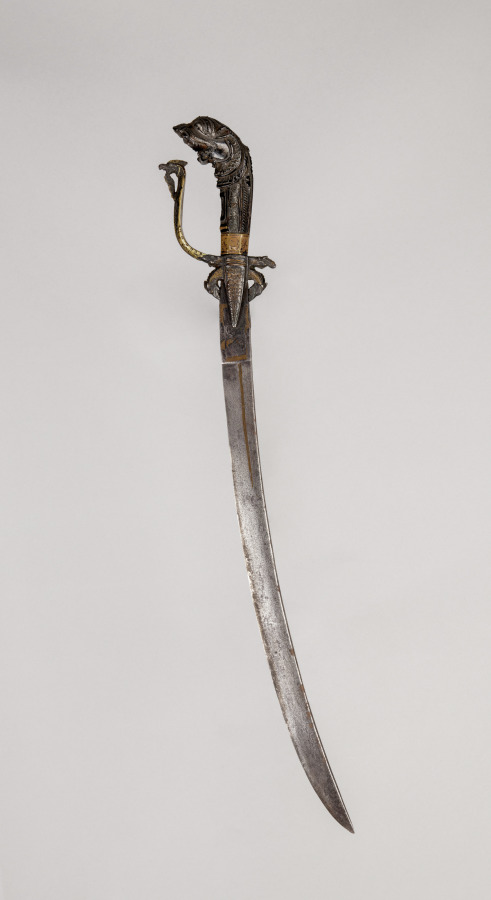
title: Sword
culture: Sri Lanka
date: c. 1800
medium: Blade: steel; hilt: wood with repoussé silver inlay and bronze fittings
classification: Arms and Armor